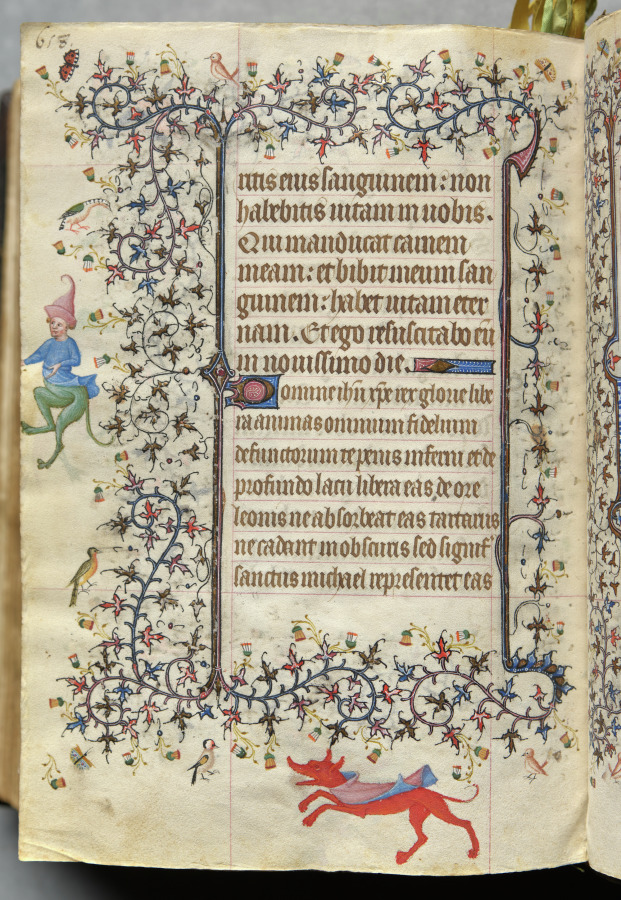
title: Hours of Charles the Noble, King of Navarre (1361-1425), fol. 323v, Text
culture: France, Paris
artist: Master of the Brussels Initials and Associates (French)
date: c. 1405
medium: ink, tempera, and gold on vellum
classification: Bound Volume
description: This precious volume was obviously highly prized by its owner, the French-born King of Navarre, who had his coat of arms painted on no less than twenty folios. Rather than directly commissioning this manuscript from a specific workshop, it seems that Charles the Noble acquired his book of hours -- perhaps ready-made for the luxury market -- while on a trip to Paris in 1404-05. A collaborative effort, six painting styles are evidenced within the pages of this codex, those of two Italians, two Frenchmen, and two Netherlanders. The painter who was responsible for the planning and decoration of the book, and who produced seventeen of the large miniatures, was a Bolognese artist known as the Master of the Brussels Initials. His principal assistant, responsible for most of the borders, was a Florentine who signed his name "Zecho" da Firenze on folio 208 verso.